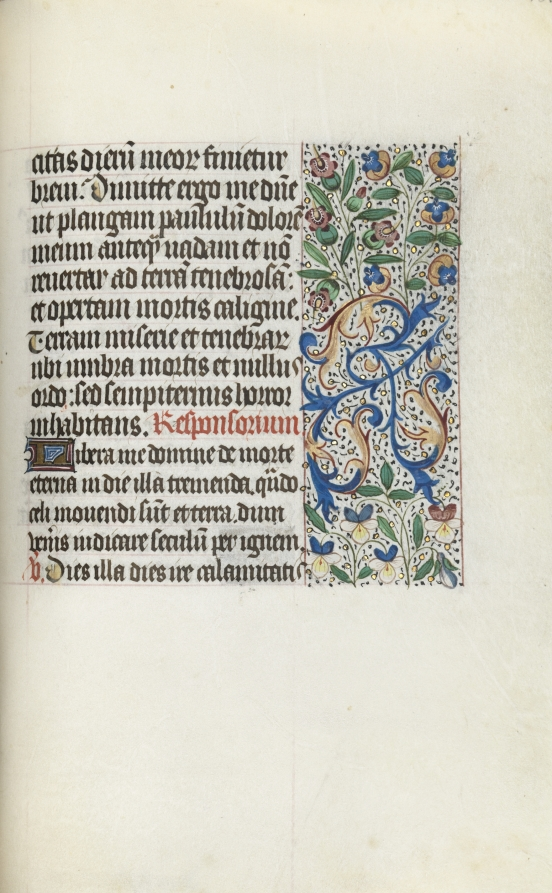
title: Book of Hours (Use of Rouen): fol. 133r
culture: France, Rouen, 15th century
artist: Master of the Geneva Latini (French, active Rouen, 1460–80)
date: c. 1470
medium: ink, tempera, and gold on vellum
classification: Bound Volume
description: In the late 1400s and early 1500s Rouen was an established and important center of book production. The city’s cathedral had a wealthy chapter that spent large sums of money to commission books and to maintain its extensive library. The stationers and booksellers would have likely been concentrated in or near the cathedral precinct. This artist, named after a manuscript now in Geneva, was Rouen’s principal illuminator during the second half of the 1400s.